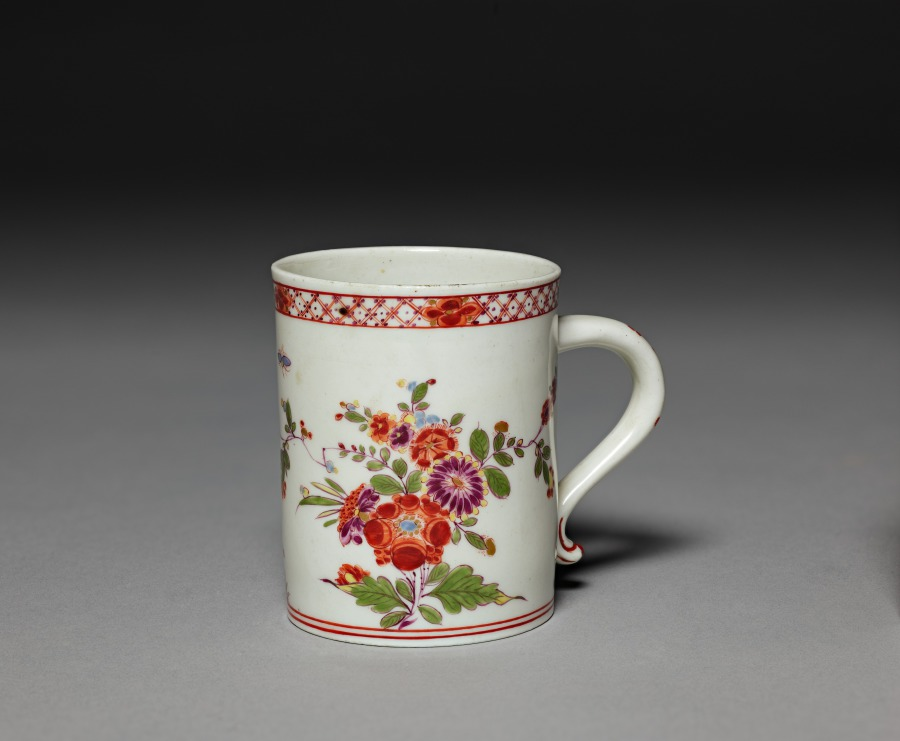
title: Small Mug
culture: Germany, Meissen, 18th century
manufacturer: Meissen Porcelain Factory (German, est. c. 1710)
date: c. 1730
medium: porcelain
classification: Ceramic